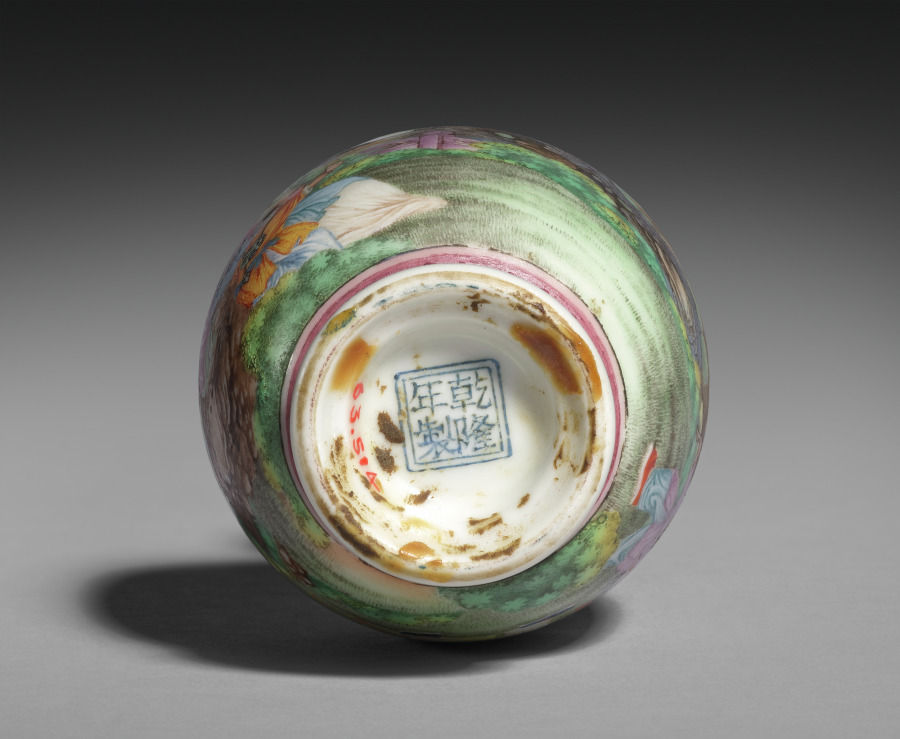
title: Vase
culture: China, Qing dynasty (1644-1911), Qianlong mark and reign (1736-95)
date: 1736–95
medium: Porcelain with decoration in colored fa-lang enamels, Guyuexuan ware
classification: Ceramic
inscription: 乾隆年製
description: The four-character mark on the base of this vase indicates that it was made in Jingdezhen and then sent to Beijing to be decorated in the imperial workshops by painters who were trained in using Western perspective and shading.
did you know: The child in orange has a bun above his ear, while the rest of his head is clean-shaven, like the other children’s.